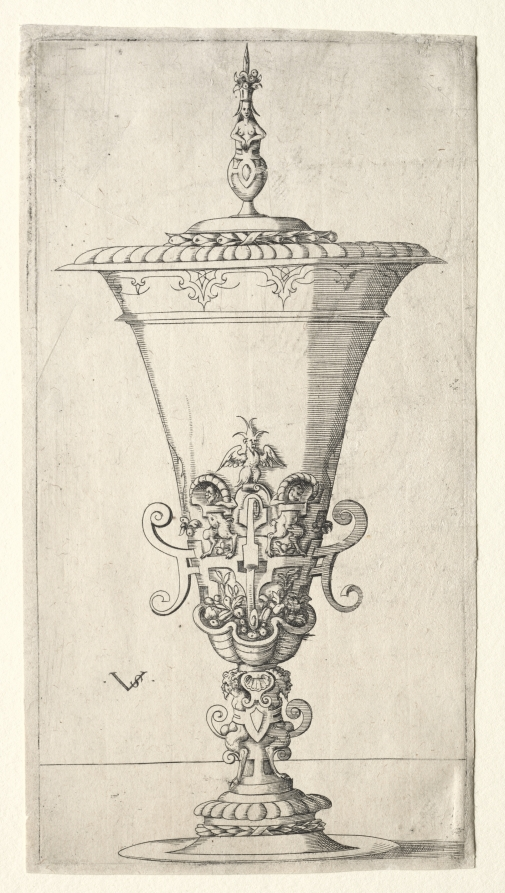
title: Covered Cup with Satyrs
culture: Germany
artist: Virgil Solis (German, 1514–1562)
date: 1530–62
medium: engraving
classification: Print